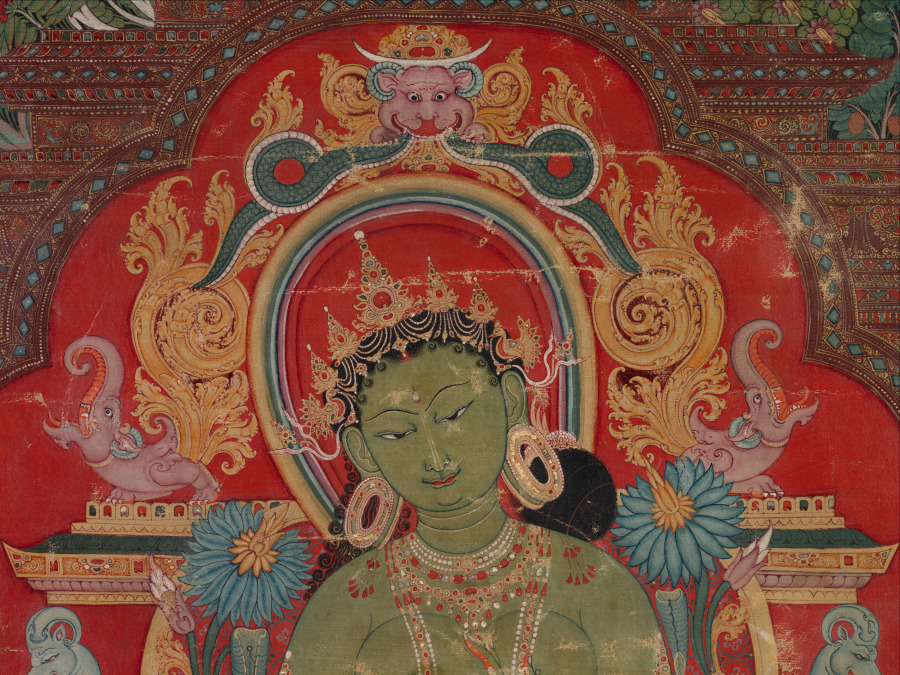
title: Green Tara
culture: Central Tibet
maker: attributed to Aniko (Nepalese, active in Tibet mid- to late 1200s)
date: c. 1260s; mounted, 2020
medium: thangka; gum tempera, ink, and gold on sized cotton; mount: silk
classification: Painting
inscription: Om Ah Hum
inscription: om tare tutare ture svaha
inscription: Om Ah Hum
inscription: Om Ah Hum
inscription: om ah sarva vyida svaha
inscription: ye dharmā hetuprabhavā he- tuṃ teṣāṃ tathāgato hy avadat teṣāṃ ca yo nirodha evaṃvādī mahāśramaṇaḥ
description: For Tibetans, Green Tara is one of the preeminent figures of their Buddhist faith, a radiant savioress who embodies the female form of the perfect, enlightened mind. The Green Tara in the Cleveland thangka—a Tibetan devotional painting on cloth—specifically dispels fear and provides protection, just like her mantra inscribed on the back side of the painting. Her green color and fear-not gesture link her to the cosmic Buddha of the North, enshrined above her head. Most scholars agree that this work was painted by the celebrated Nepalese artist known as Aniko.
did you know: The tiny monastic figure under Green Tara's right hand commissioned the painting.